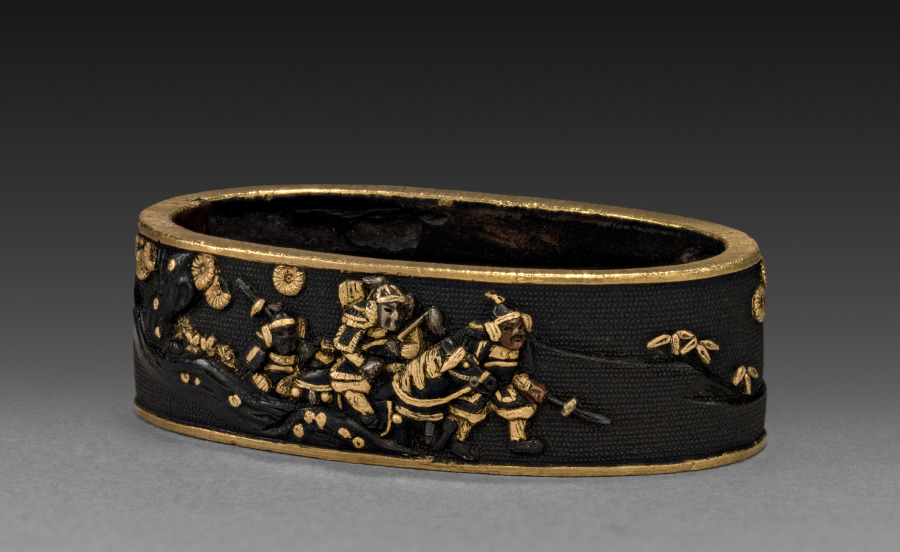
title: Sword-Hilt Collar (Fuchi)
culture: Japan, Edo period (1615–1868)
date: 1700–1850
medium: shakudo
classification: Arms and Armor